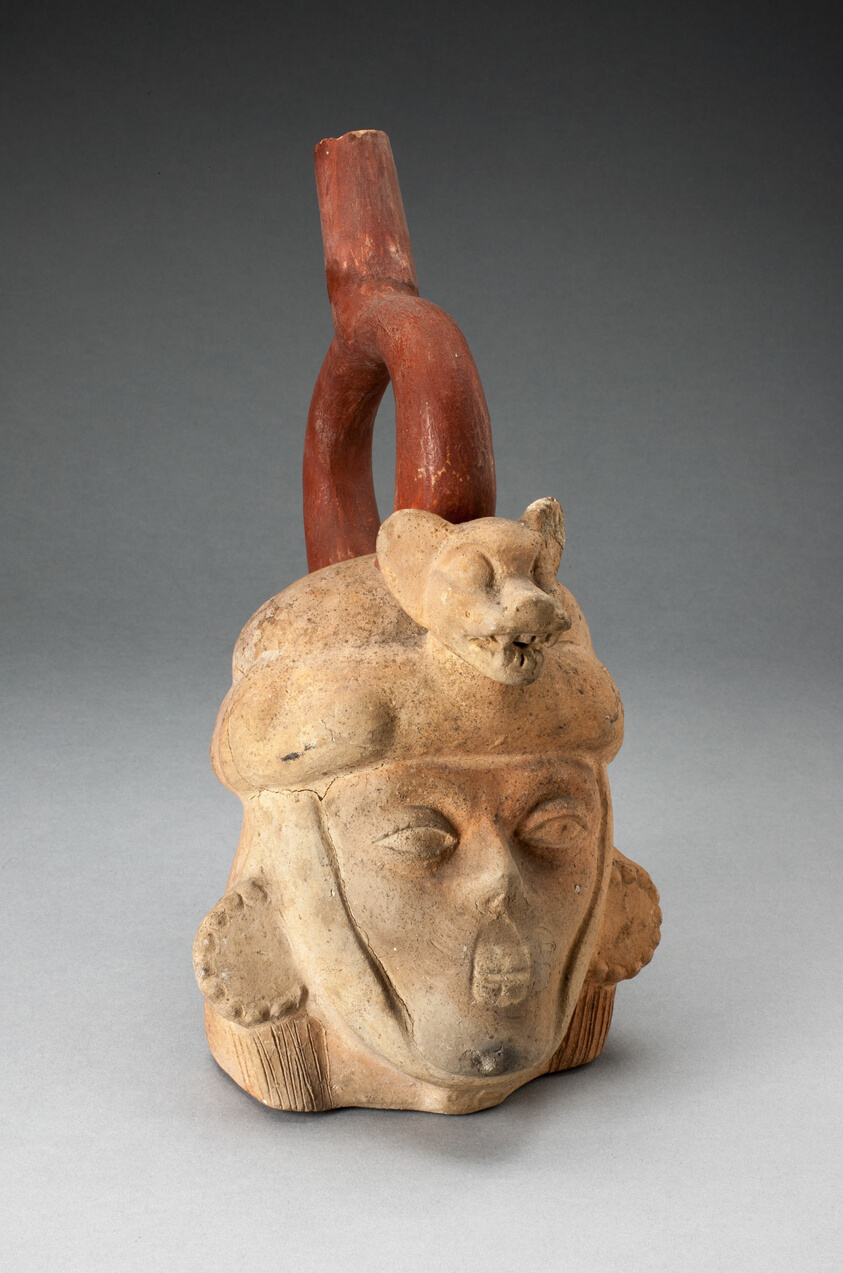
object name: Vessel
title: Portrait Vessel of a Ruler with Feline Headdress and Facial Deformities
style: moche, Arts of the Americas, andes, south american, andean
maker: Moche (Chimbote, Santa Valley, north coast, Peru)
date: 100 BCE–500 CE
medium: Ceramic and pigment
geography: Peruvian North Coast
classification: earthenware; ceramics; vessel; art of the americas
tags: people, portraits